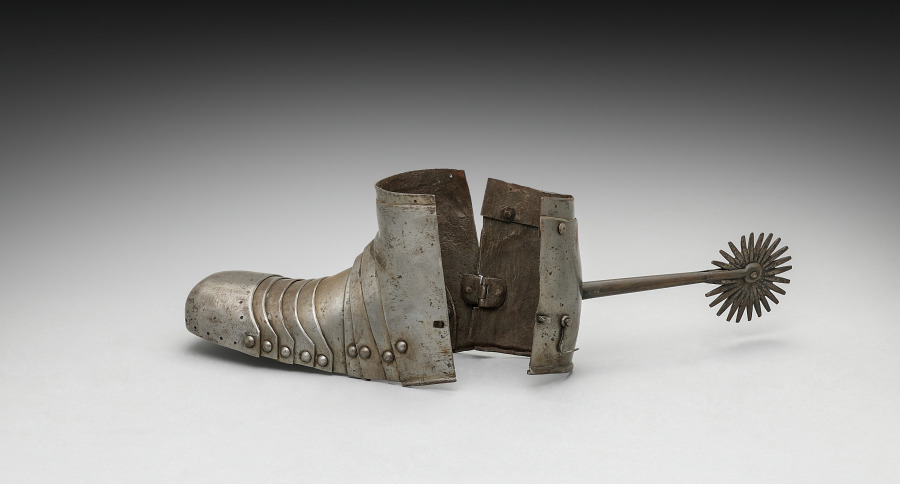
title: Right Sabatoun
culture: Germany, 19th century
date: 1801–1900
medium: steel with black paint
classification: Arms and Armor